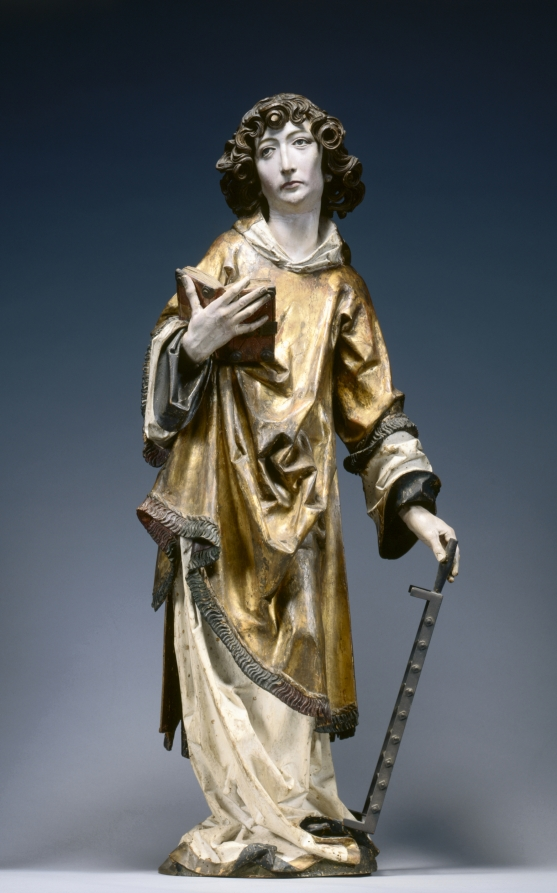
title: Saint Lawrence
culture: Germany, Würzburg, 16th century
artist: Tilman Riemenschneider (German, active Würzburg, c. 1460–1531)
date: 1502–8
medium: lindenwood with polychromy and gilding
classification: Sculpture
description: This sculpture, along with that of Saint Stephen (1959.43), and two female saints preserved in Frankfurt (Historisches Museum), are believed to be the remaining fragments of a large altarpiece carved by Riemenschneider for the Dominican convent in Rothenburg in Franconia (demolished in 1813). Saints Stephen and Lawrence both wear the dalmatic to indicate their status as deacons in the early church. Each holds a symbol of his martyrdom; here, Saint Lawrence holds a grill to indicate his death by burning. Late Gothic Style Art in Germany through the early 1500s remained firmly anchored in the late Gothic style with its associated interests in realism. Riemenschneider was one of the most prolific and versatile sculptors of this style, a recognized master in both stone and wood. His flourishing workshop employed as many as 40 apprentices in sculpting, woodcarving, and painting. His sculptures are noted for the dreamy, melancholy, and introspective quality in their expressions, as well as their remarkable attention to detail.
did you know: Before Riemenschneider finally settled in Würzburg, Germany, in 1484, he traveled to Strasbourg and Colmar, where he became acquainted with the works of the engraver Martin Schongauer.